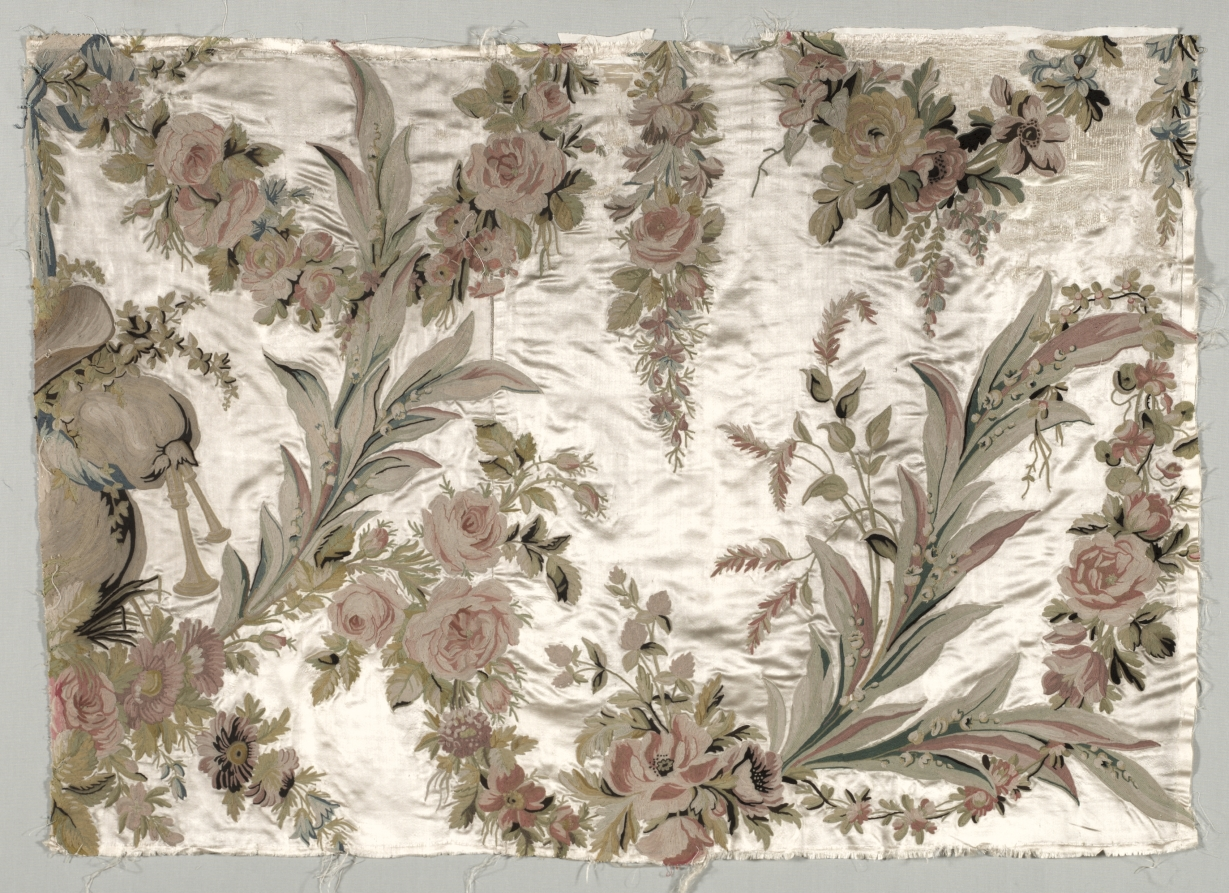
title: Coverlet Fragment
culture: France, 18th Century, period of Louis XVI (1774-1793)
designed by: Philippe de Lasalle (French, 1723–1805)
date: c. 1760–1770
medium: embroidered satin and silk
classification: Textile